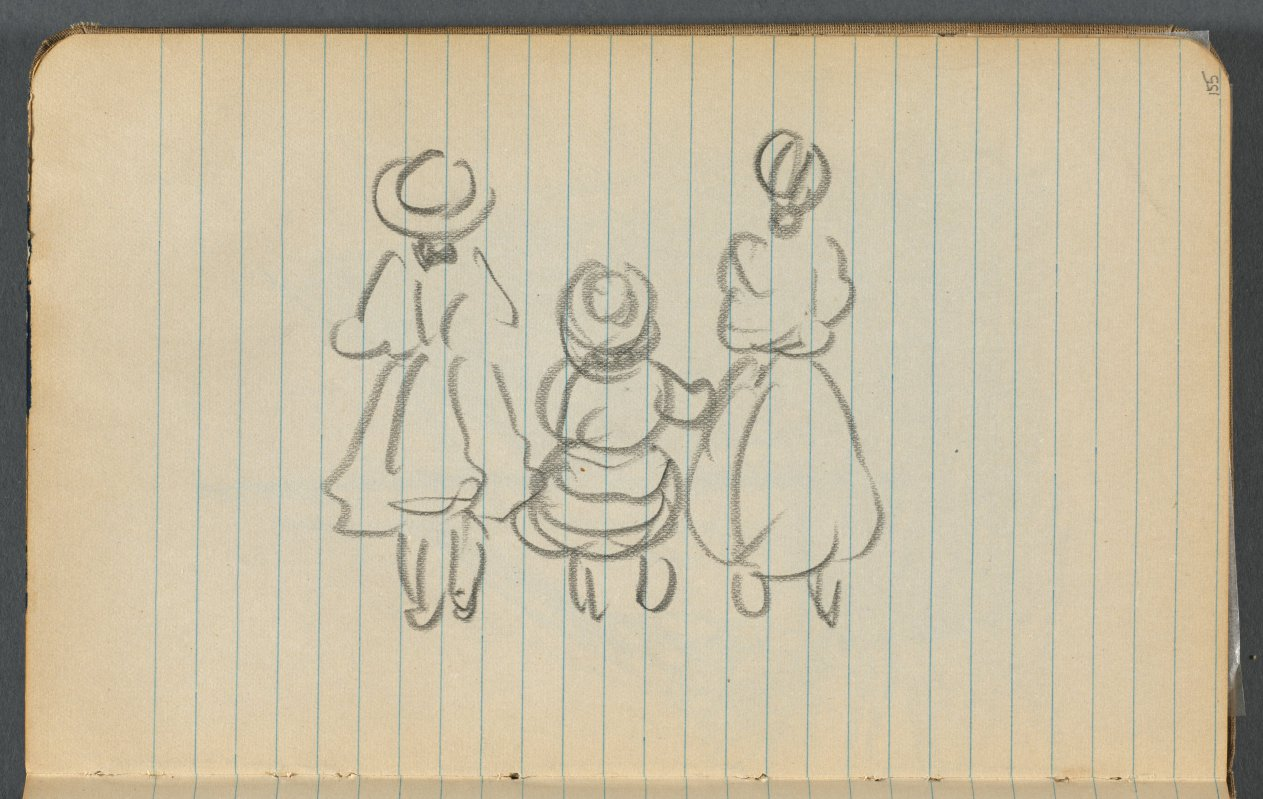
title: Sketchbook, page 155: Three Female Figures seen from the back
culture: America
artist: Maurice Prendergast (American, born Newfoundland [now Canada], 1858–1924)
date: 1905–10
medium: graphite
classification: Bound Volume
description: This sketchbook contains 69 pages of drawings, a diary largely devoted to the state of the artist's health, and a three-page discourse on the nature of genius and ideas.